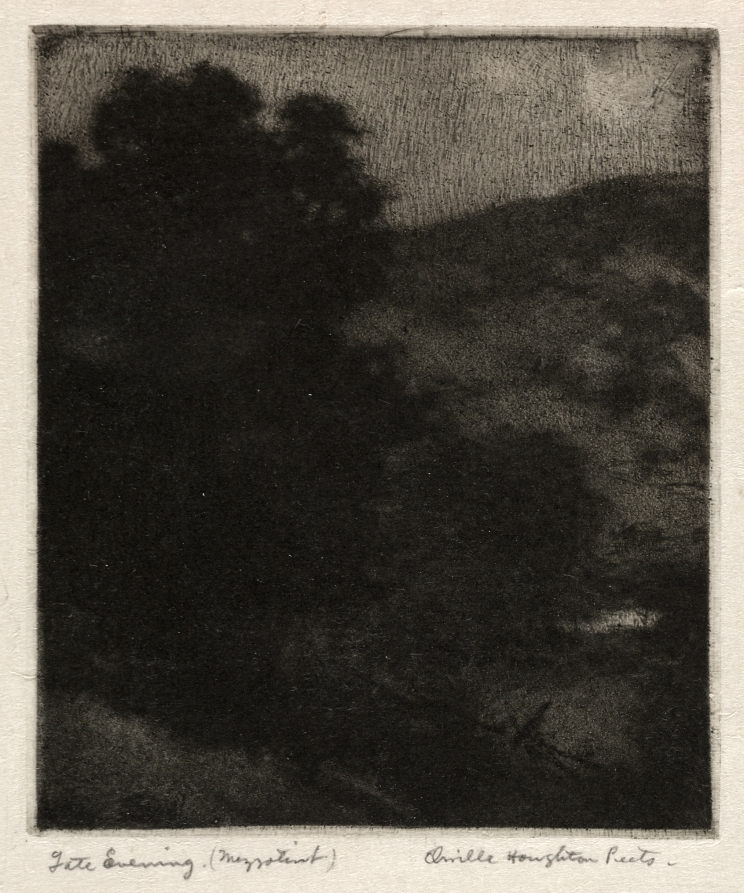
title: Late Evening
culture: America, Ohio, Cleveland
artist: Orville Houghton Peets (American, 1884–1968)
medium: mezzotint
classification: Print